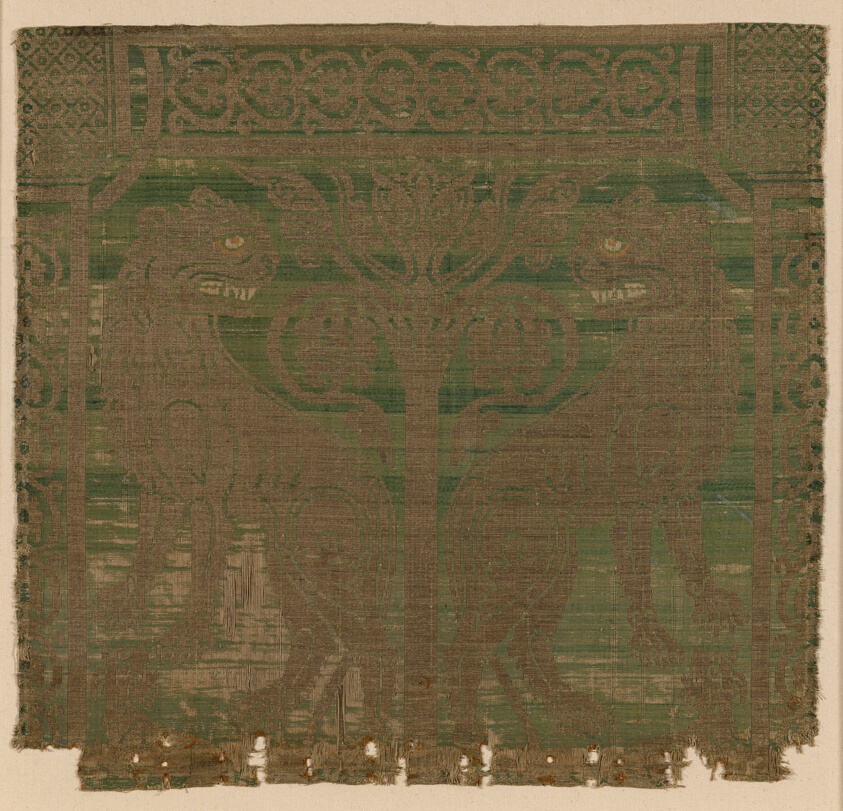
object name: Textile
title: Fragment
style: mudéjar, medieval, european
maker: Spain or Sicily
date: 13th century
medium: Silk, linen, and gilt-animal-substrate-wrapped linen, complementary weft twill weave with inner warps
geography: Spain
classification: textile; weaving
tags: dogs, animals